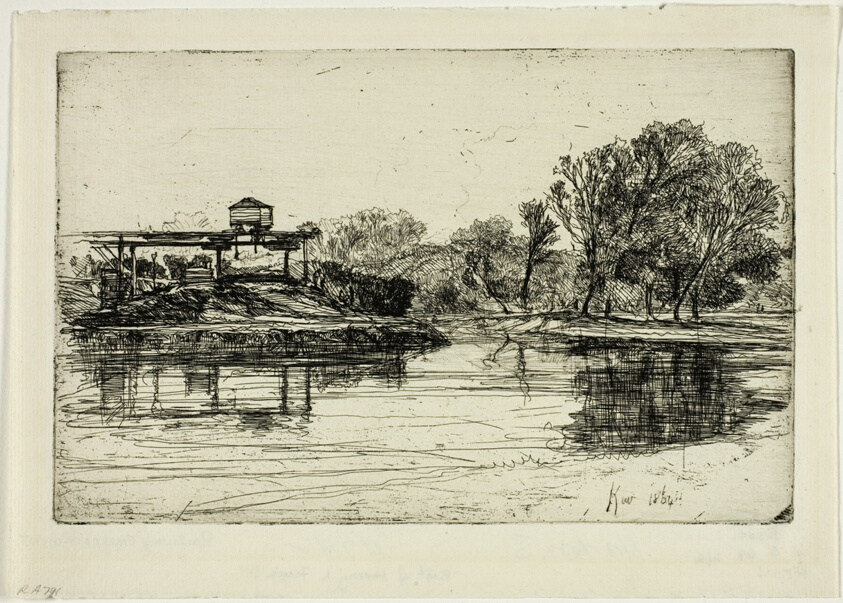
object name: Print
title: Railway Encroachment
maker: Francis Seymour Haden (English, 1818-1910)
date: 1864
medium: Etching on ivory laid paper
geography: England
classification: etching; print; prints and drawing